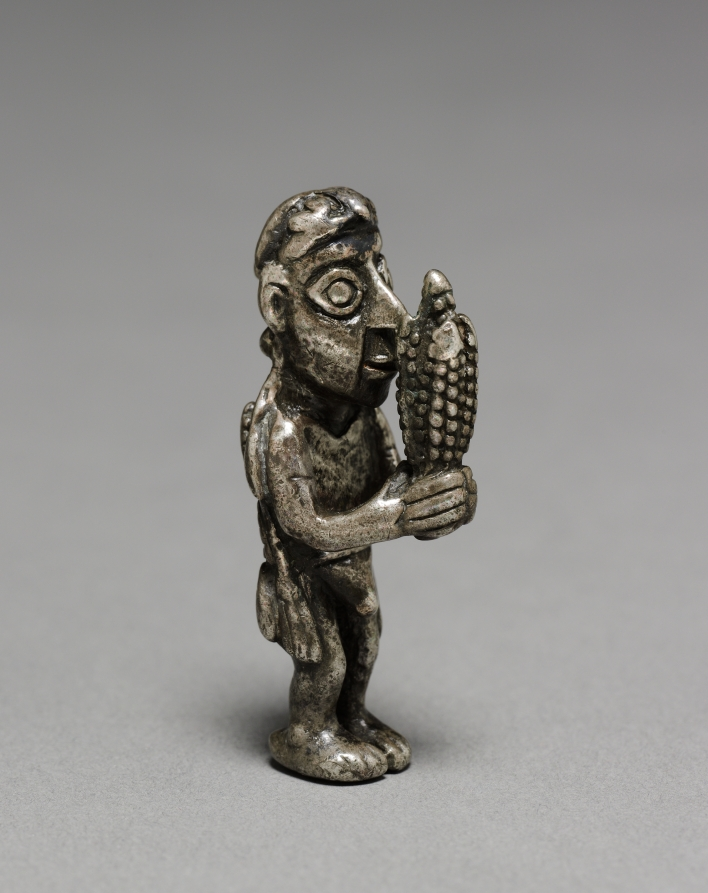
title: Agricultural Figurine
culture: Peru, Inka style (1400-1532)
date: 1400–1532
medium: cast silver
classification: Sculpture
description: Precious metal was a major Inka artistic medium, but most was melted down after the conquest to fund the Spanish court. The sole remains are small-scale objects from tombs and offerings. The body of the figurine is covered with fruits and vegetables and may have been made after the Spanish conquest.